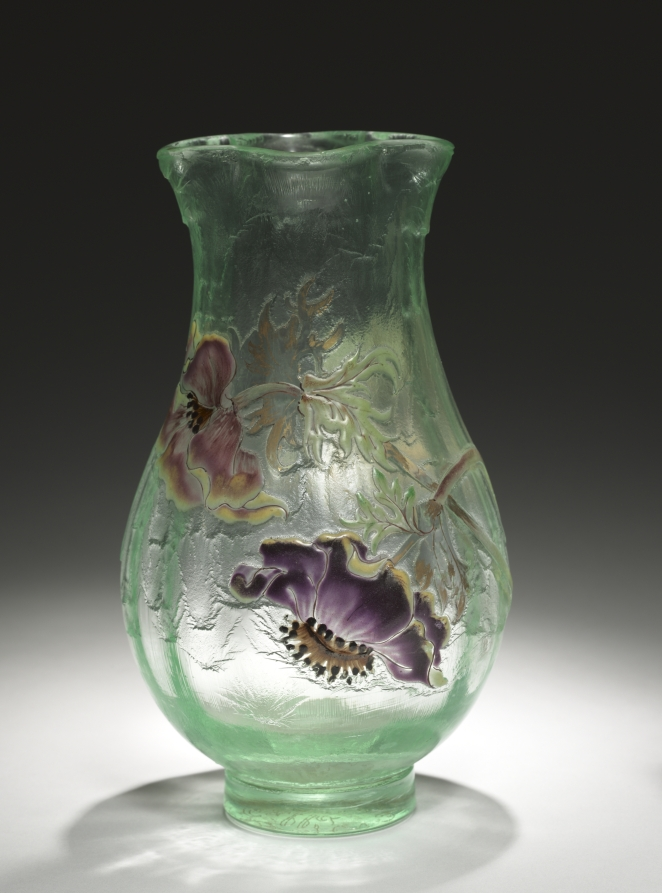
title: Vase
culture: France, early 20th Century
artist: Emile Gallé (French, 1846–1904)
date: c. 1900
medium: enameled glass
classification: Glass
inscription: etched on bottom: Gallé/deposé/G.G.